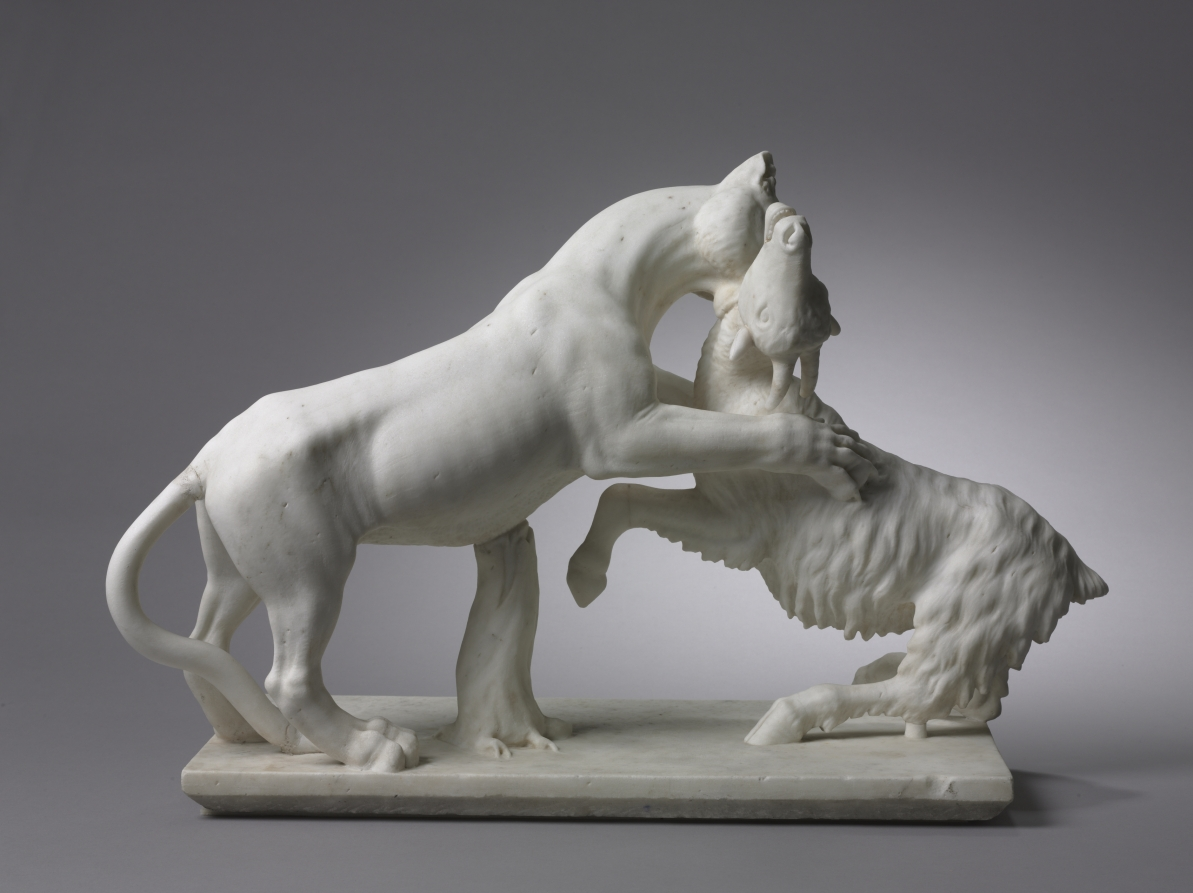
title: Panther Attacking a Goat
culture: Italy, 18th century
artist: Francesco Antonio Franzoni (Italian, 1734–1818)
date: late 1700s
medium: marble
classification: Sculpture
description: One of the best known restorers of ancient sculpture, Francesco Franzoni often invented totally new compositions from small fragments. However, this sculpture is entirely Franzoni’s own work, down to the breaks seen in such places as the panther’s tail and the goat’s legs and jaw. Curiously, Franzoni based this work on one of his own restorations, now in the Vatican, although his composition here is more balanced and elegant, in keeping with ideas in the late 1700s about how ancient sculpture should look.